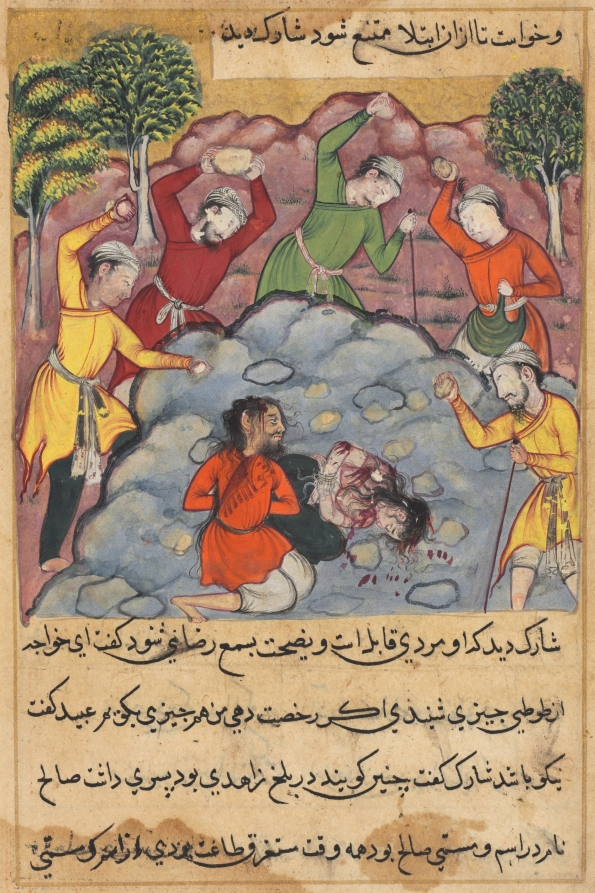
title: The Raja’s daughter and her lover stoned to death for adultery, from a Tuti-nama (Tales of a Parrot): Forty-Second Night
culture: Mughal India, court of Akbar (reigned 1556–1605)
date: c. 1560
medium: gum tempera, ink, and gold on paper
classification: Painting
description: In this gory scene, the body of the raja’s daughter lies crumbled and bloody at her lover’s side. He sits resolutely facing his executioners with his hair disheveled and a pained expression on his face. The couple is surrounded by a group of men who wield stones in their raised hands.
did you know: The woman’s treachery was predicted from birth.